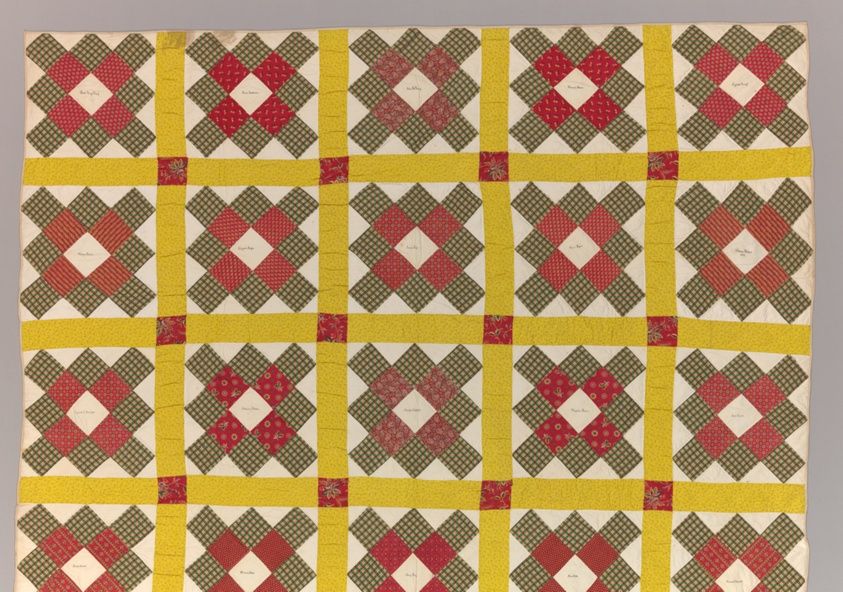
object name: Textile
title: Bedcover ("Album Patch" or "Signature" Quilt)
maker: Possibly Hunderdon County, New Jersey, United States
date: 1847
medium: Cotton, plain weaves; printed; quilted; backed and edged with cotton, plain weave; pieced; printed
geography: United States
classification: needlework - quilt; textile